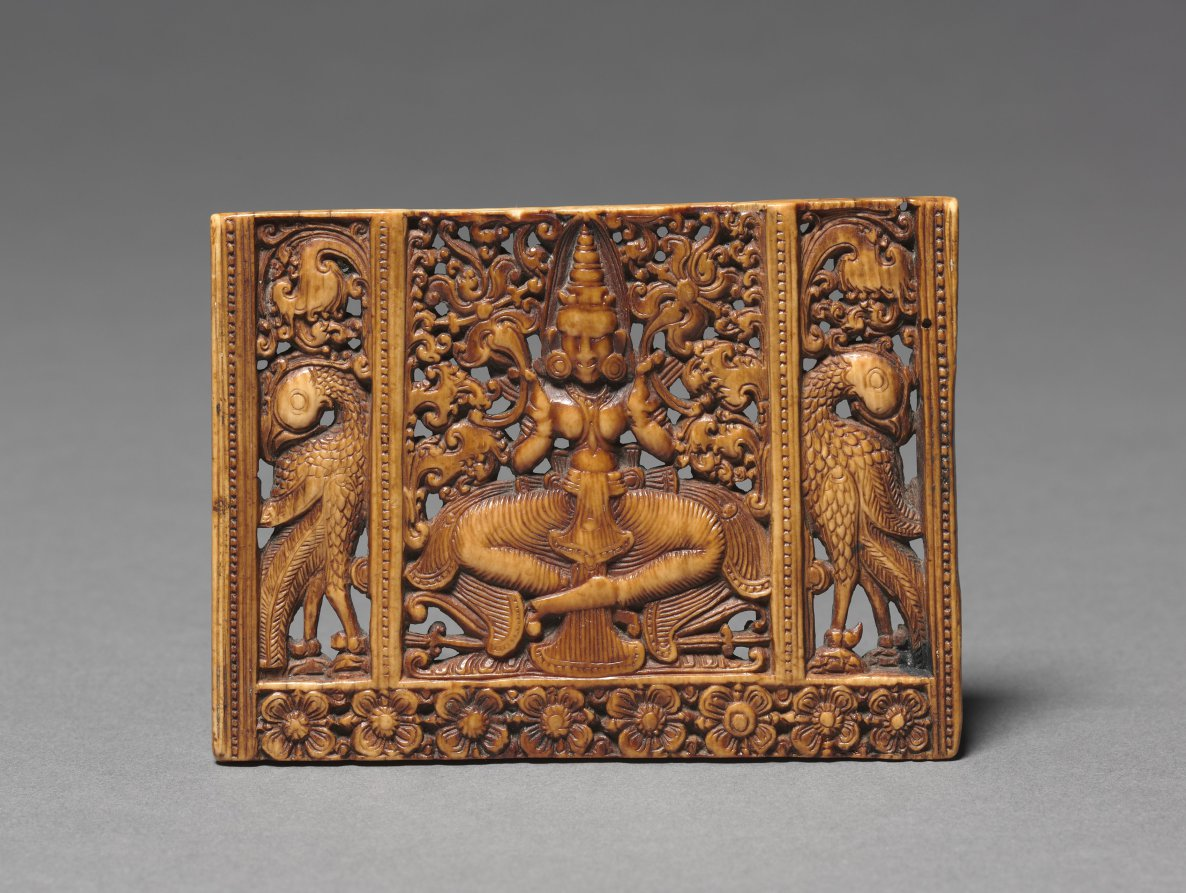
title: Comb Panel with a Seated Devi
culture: Ceylon, Kandy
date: 1600s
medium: ivory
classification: Ivory